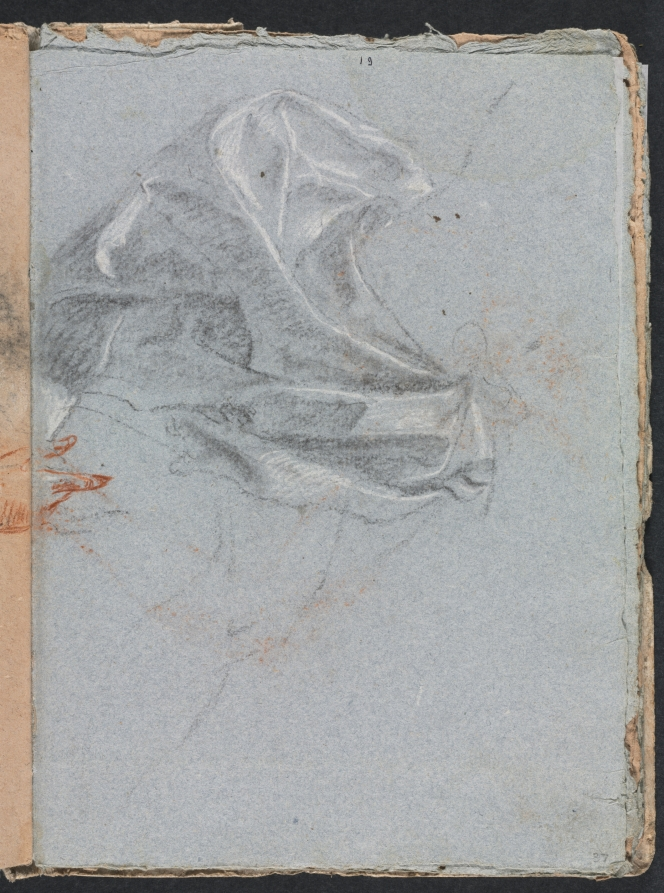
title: Verona Sketchbook: Drapery study (page 37)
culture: Italy, 18th century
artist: Francesco Lorenzi (Italian, 1723–1787)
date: 1760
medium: black chalk with white heightening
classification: Bound Volume